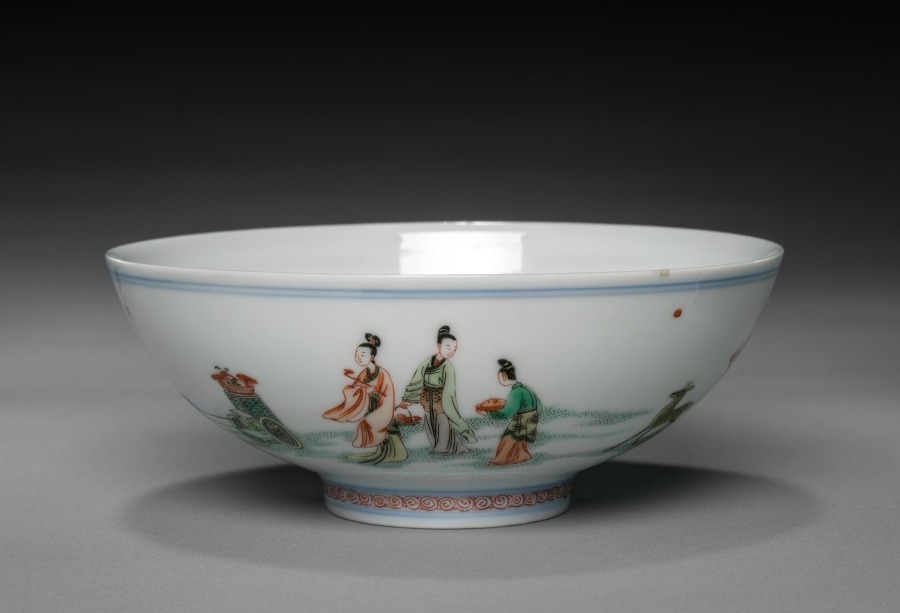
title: Bowl with Xiwangmu and Attendants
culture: China, Jiangxi province, Jingdezhen, Qing dynasty (1644-1911), Kangxi reign (1662-1722), but Chenghua mark (1465-87)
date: 1662–1722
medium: porcelain with famille verte overglaze enamel decoration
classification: Ceramic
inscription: 大明成化年製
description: Xiwangmu is the name for the Queen Mother of the West, an ancient Chinese goddess.